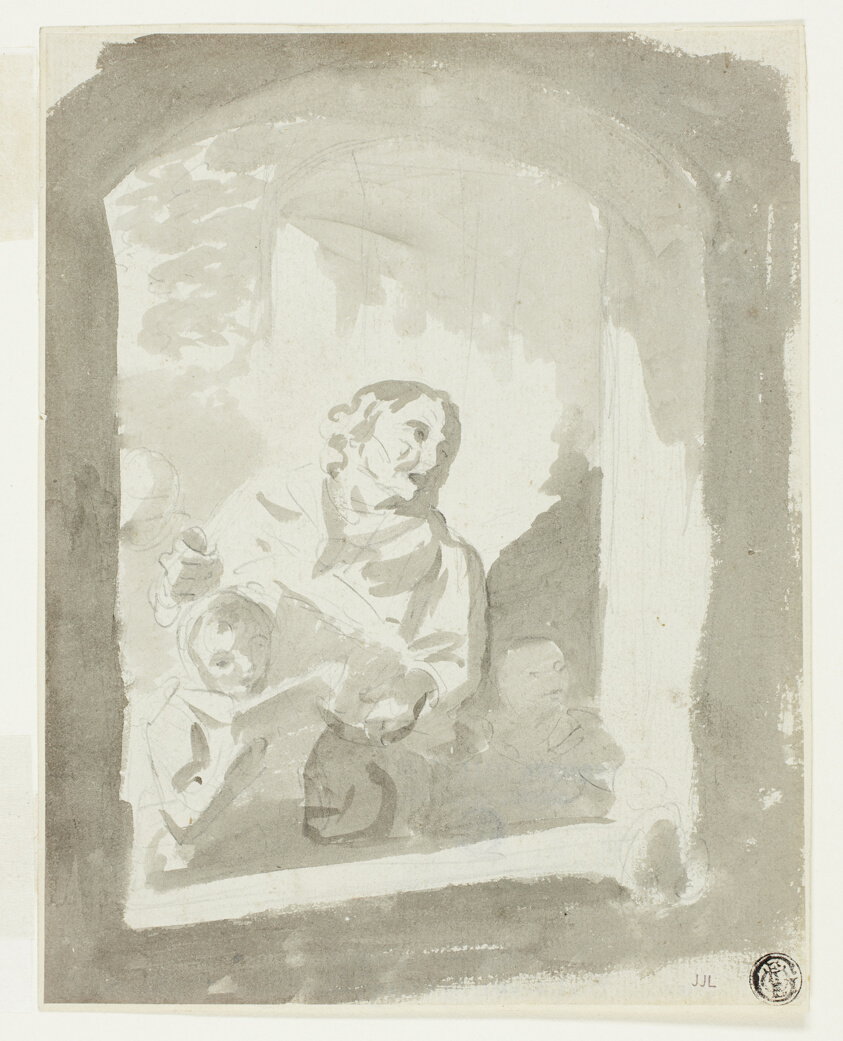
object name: Drawing and Watercolor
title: Man and Two Children at Window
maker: Style of Jean Louis de Marne (French, 1741-1829); or Jean-Baptiste Greuze (French, 1725-1805)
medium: Brush and gray wash over graphite on ivory laid paper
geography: France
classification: ink or chalk wash; drawings (visual works); prints and drawing